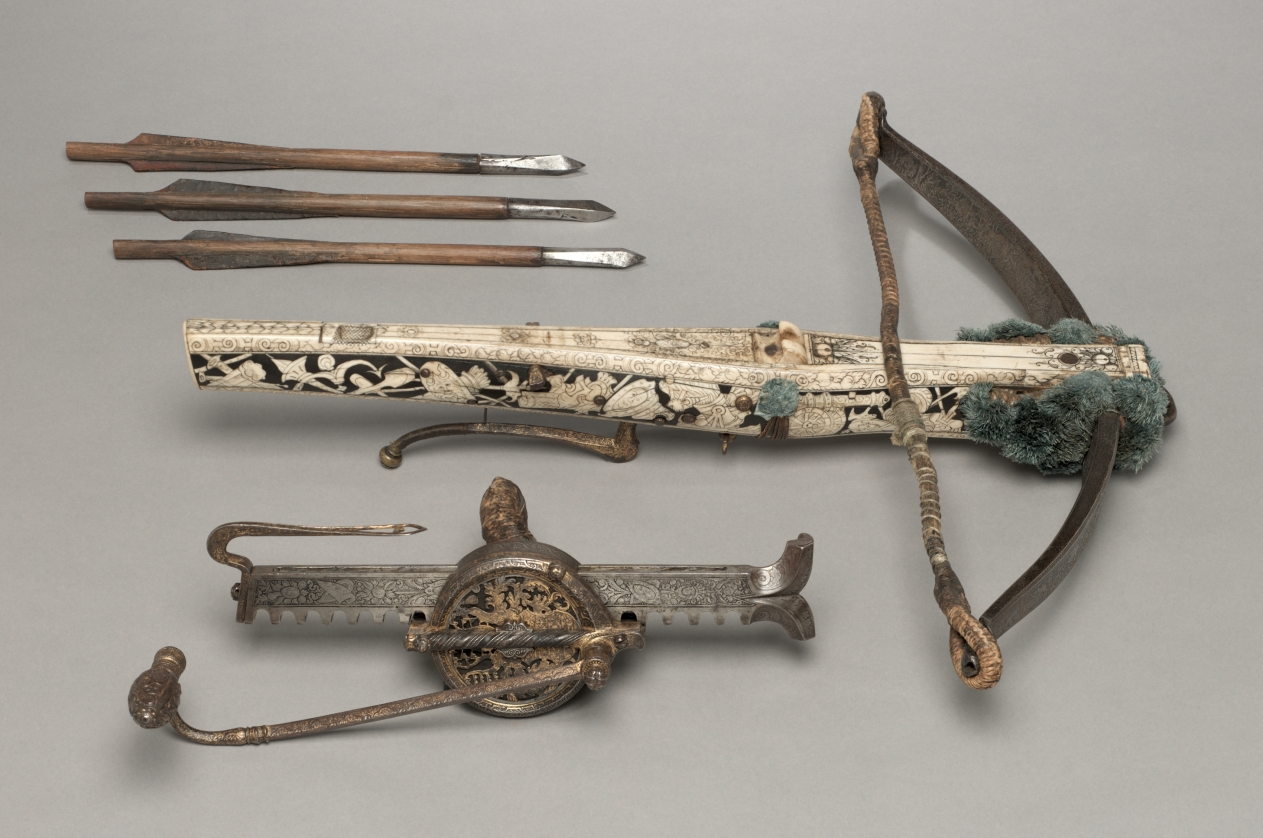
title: Crossbow Bolt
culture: Germany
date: 1500s–1600s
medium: wood, leather, steel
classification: Arms and Armor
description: Also known as a quarrel, crossbow bolts are stockier than arrows, are constructed of durable materials, and can be reused on the field of battle.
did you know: Bolts with leather feathering were used mainly in the Tyrolean area, which includes northern Italy and western Austria.